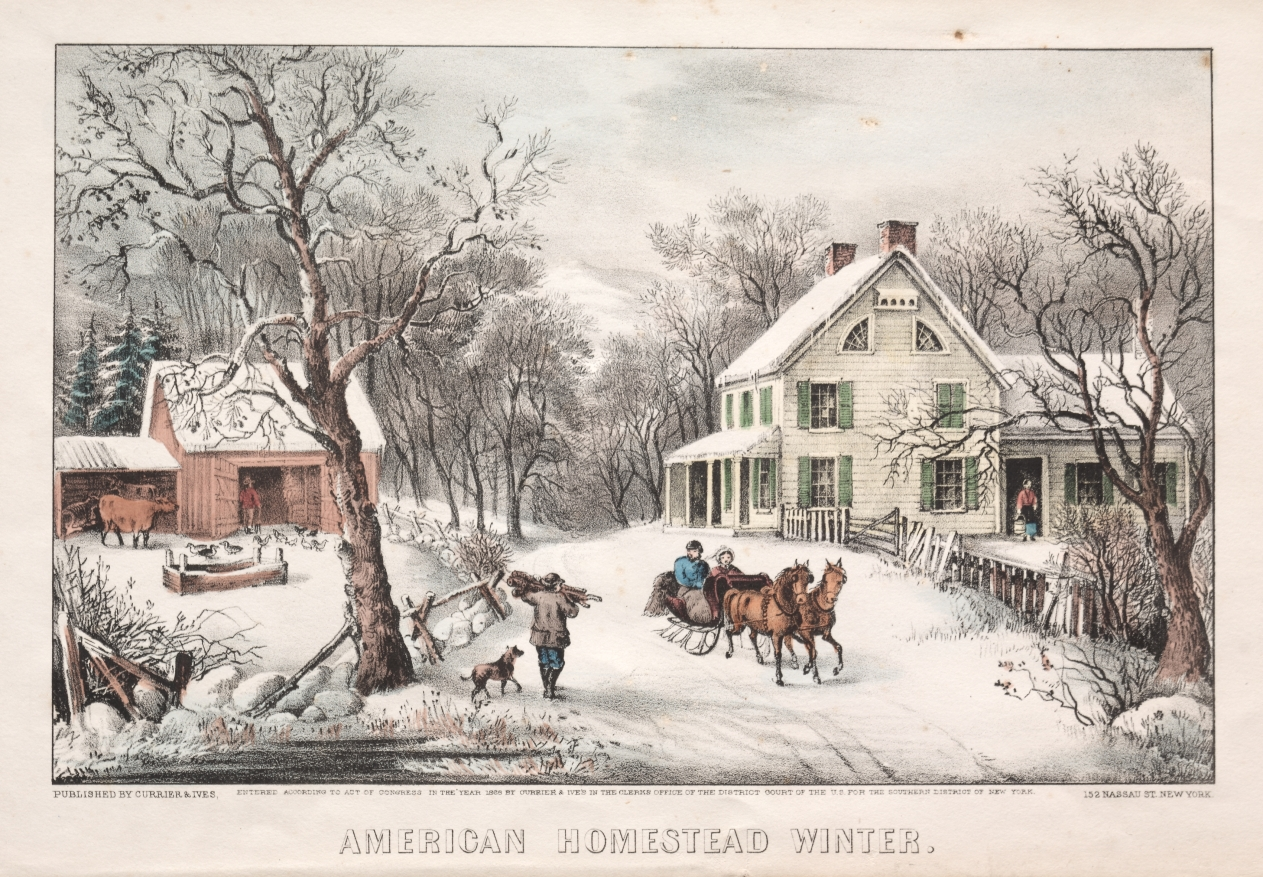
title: American Homestead, Winter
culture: America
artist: and James Merritt Ives (American, 1824–1895)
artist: Nathaniel Currier (American, 1813–1888)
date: 1868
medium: lithograph, hand colored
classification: Print